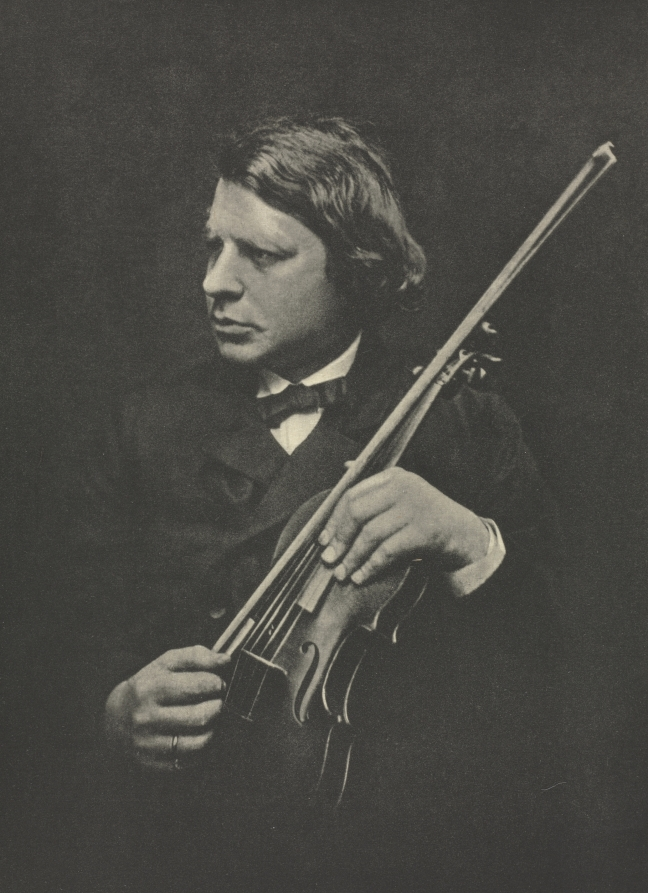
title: Camera Work: Joachim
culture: England, 20th century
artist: Julia Margaret Cameron (British, 1815–1879)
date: 1913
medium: photogravure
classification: Bound Volume